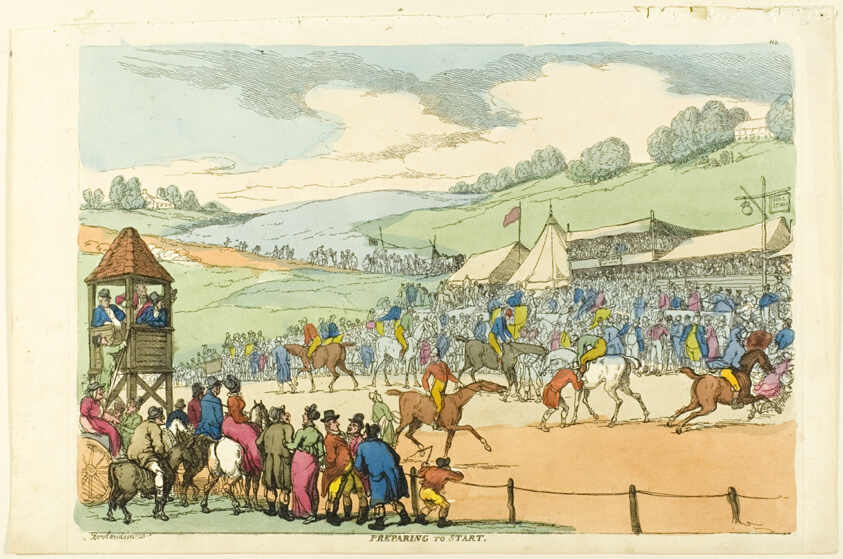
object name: Print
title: Preparing to Start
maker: Thomas Rowlandson (English, 1756-1827)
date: 1811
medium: Hand-colored etching on ivory wove paper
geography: England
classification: etching; print; prints and drawing